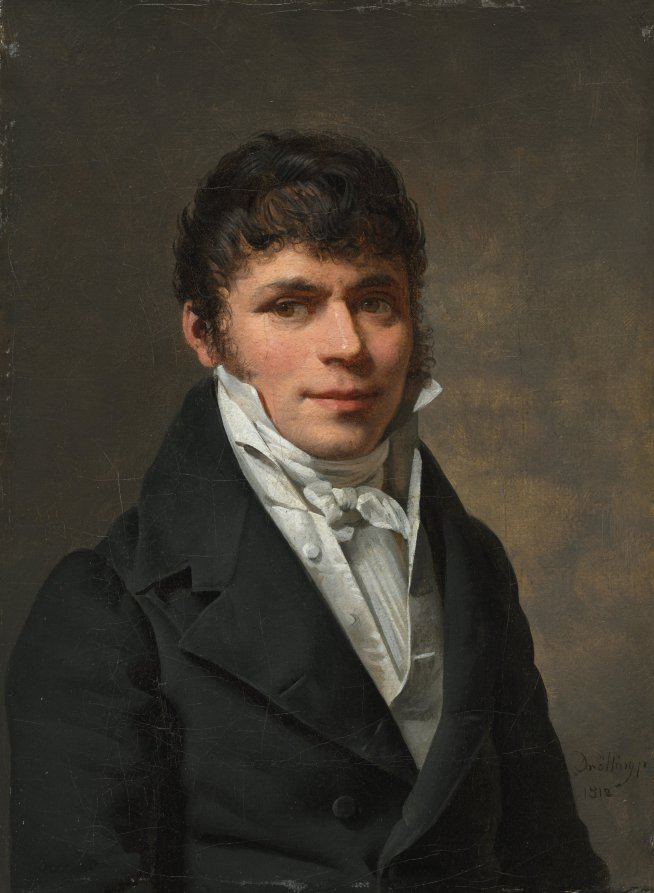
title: Nicolas Louis Faret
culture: France, 19th century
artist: Martin Drölling (French, 1752–1817)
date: 1812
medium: oil on canvas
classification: Painting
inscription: "Drollin(g)" ("g" obscured by frame) and "1812" in black paint, lower right Signed, dated, and inscribed with the sitter's name on the back of the stretcher